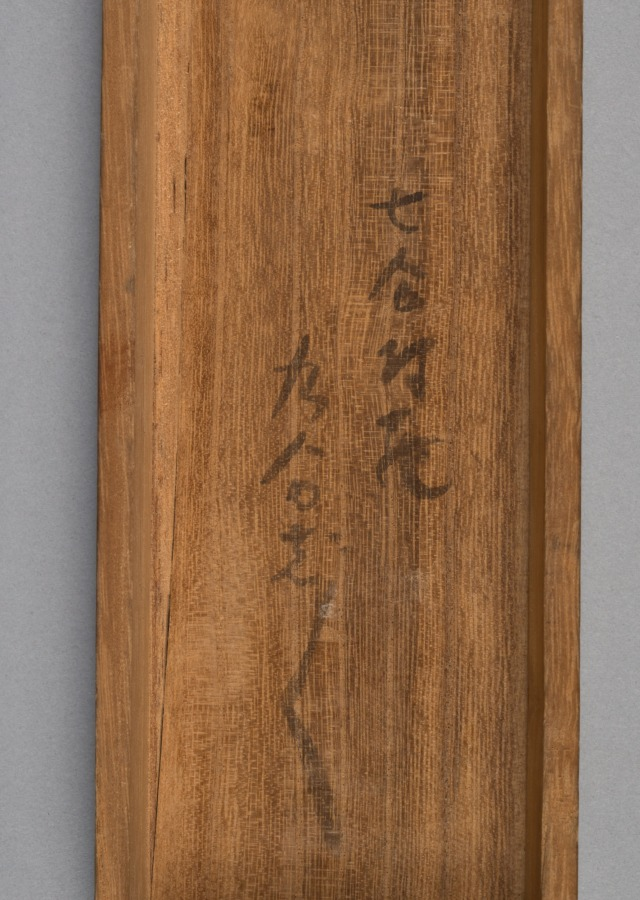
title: Landscape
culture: Japan, possibly Edo period (1615-1868)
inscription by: copy after Ishō Tokugan (Japanese, c. 1359–1437)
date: early 1600s to mid-1800s?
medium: hanging scroll; ink and slight color on paper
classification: Painting